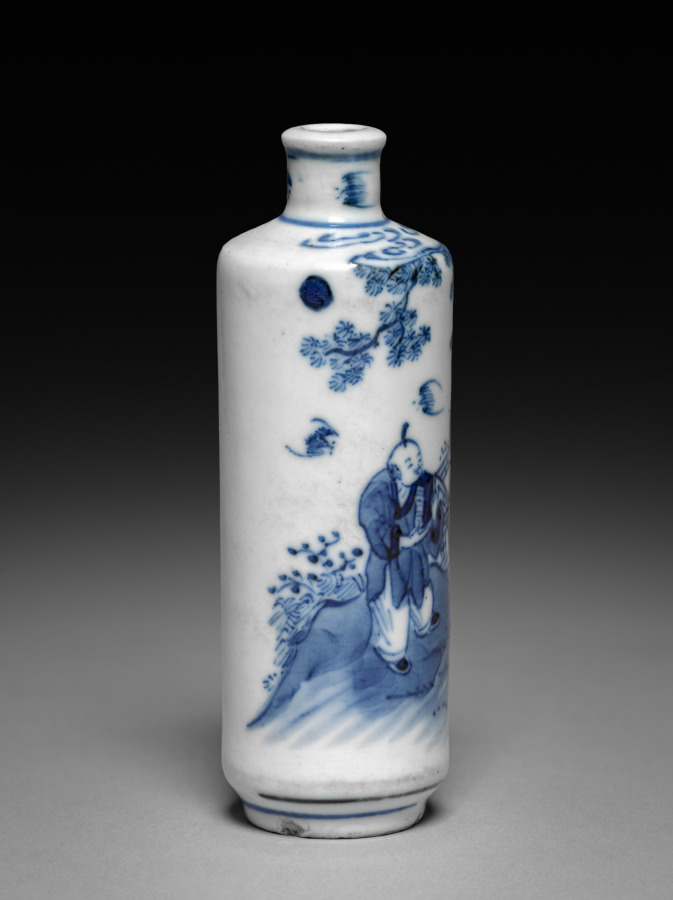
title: Blue and White Snuff Bottle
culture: China, Qing dynasty (1644-1911), Kangxi reign (1661-1722)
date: 1661–1722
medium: porcelain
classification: Ceramic